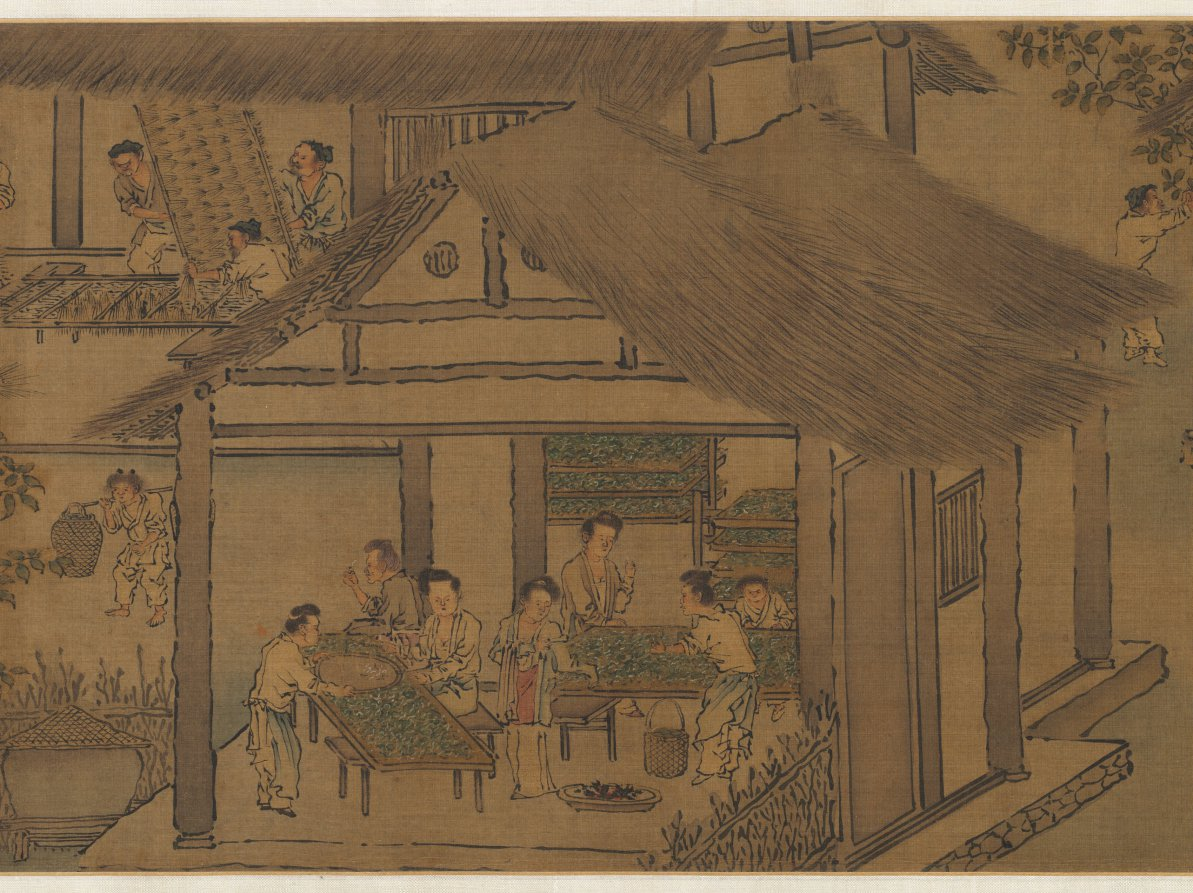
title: Sericulture (The Process of Making Silk)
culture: China, Southern Song dynasty (1127-1279)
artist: attributed to Liang Kai (Chinese, mid-1100s–early 1200s)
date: early 1200s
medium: Handscroll; ink and color on silk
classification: Painting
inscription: 3 colophons and 7 seals of Ch'eng Ch'i (20th c.).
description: By the Southern Song period, the economic center of the silk industry had shifted to the lower Yangzi delta, while the north continued to be troubled by wars. Divided into three sections, the handscroll illustrates 14 steps in the process of making silk, from the raising of silkworms to the weaving of silk cloth. The scroll’s scenes follow the illustrations of Lou Shou’s (1090–1162) Pictures of Tilling and Weaving (gengzhi tu), the first recorded painting of this genre, which was conceived in Hangzhou around 1145. However, in the Cleveland painting the artist groups several scenes of sericulture together under the roof of an open structure.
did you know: The painting is attributed to Liang Kai, a court artist active from about 1201 to 1204 at the Imperial Painting Academy in the city of Hangzhou, a major silk weaving center from that time to the present day.